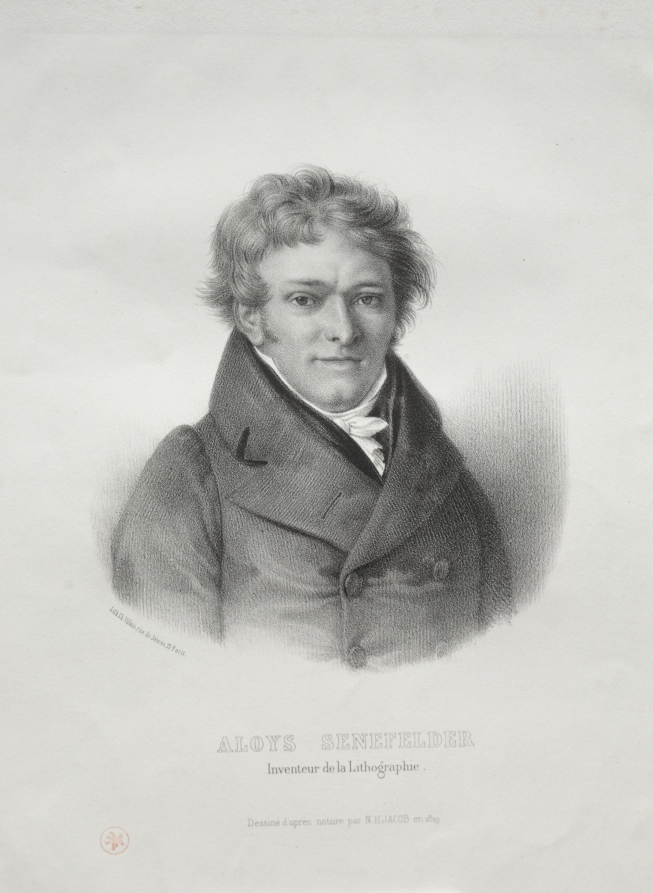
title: Aloys Senefelder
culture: France, 19th century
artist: Nicolas Henri Jacob (French, 1782–1871)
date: 1819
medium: lithograph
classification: Print